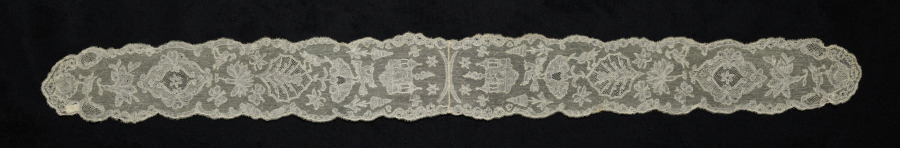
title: Lace Lappet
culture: Belgium, Mechelen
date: 1700s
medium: Linen: bobbin lace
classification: Lace